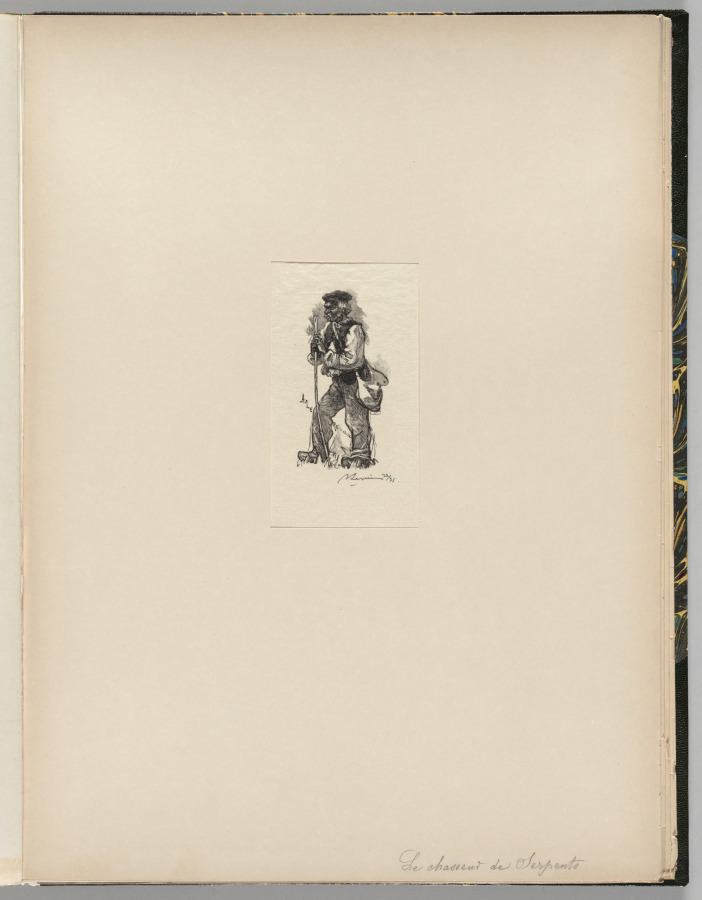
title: Fontainebleau Forest: Serpent Merchant (La Forêt de Fontainebleau: Le chasseur de serpents)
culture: France, 19th century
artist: Auguste Louis Lepère (French, 1849–1918)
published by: A. Desmoulins, Published in Revue Illustrée, 1887–90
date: 1890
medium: wood engraving from bound volume of 34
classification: Bound Volume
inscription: In block, lower left: A. LEPÈRE. Del. sc; below image, lower right, in black ink: ALepère 22/35; on window mat, lower right, in graphite: Le chasseur de Serpents